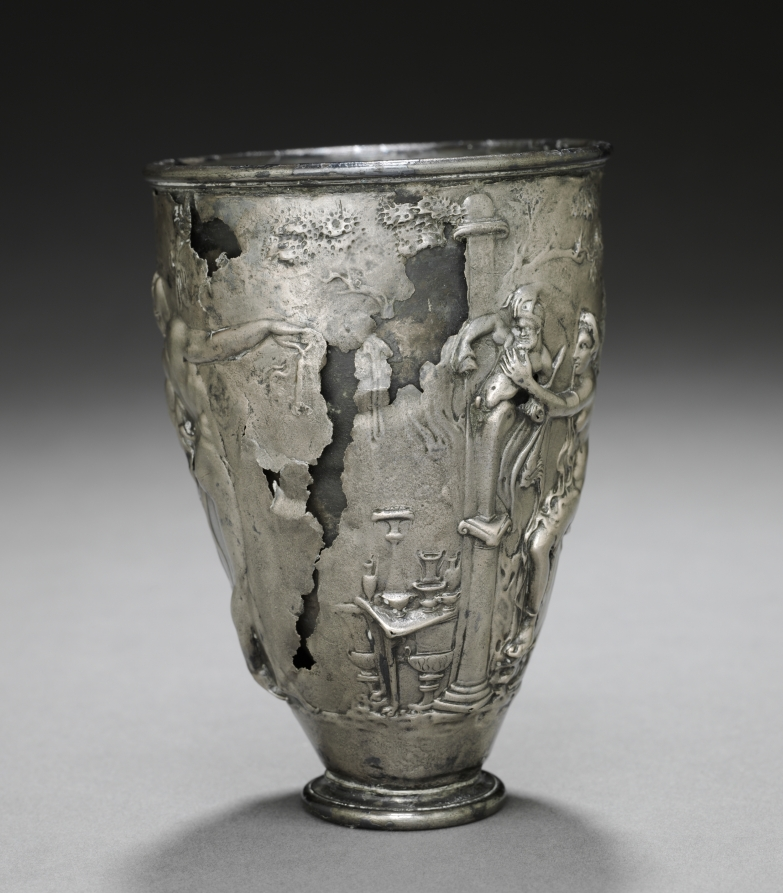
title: The Vicarello Goblet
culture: Italy, Vicarello (ancient Aquae Apollinares), Roman, Augustan period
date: 25 BCE–25 CE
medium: silver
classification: Metalwork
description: This masterpiece of the Roman silversmith’s art is exquisitely worked in relief. The multifigure scene centers on a rustic shrine of the ithyphallic fertility god Priapus, son of Dionysos. He takes the form of a stylized boundary marker atop a column, where a woman seems to have brought him to life by touching him. To the left sits a table with votive offerings to the god. Flanking the shrine are a satyr and maenad, dancing ecstatically.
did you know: This silver cup was found north of Rome at Vicarello (ancient Aquae Apollinares), probably in 1862.